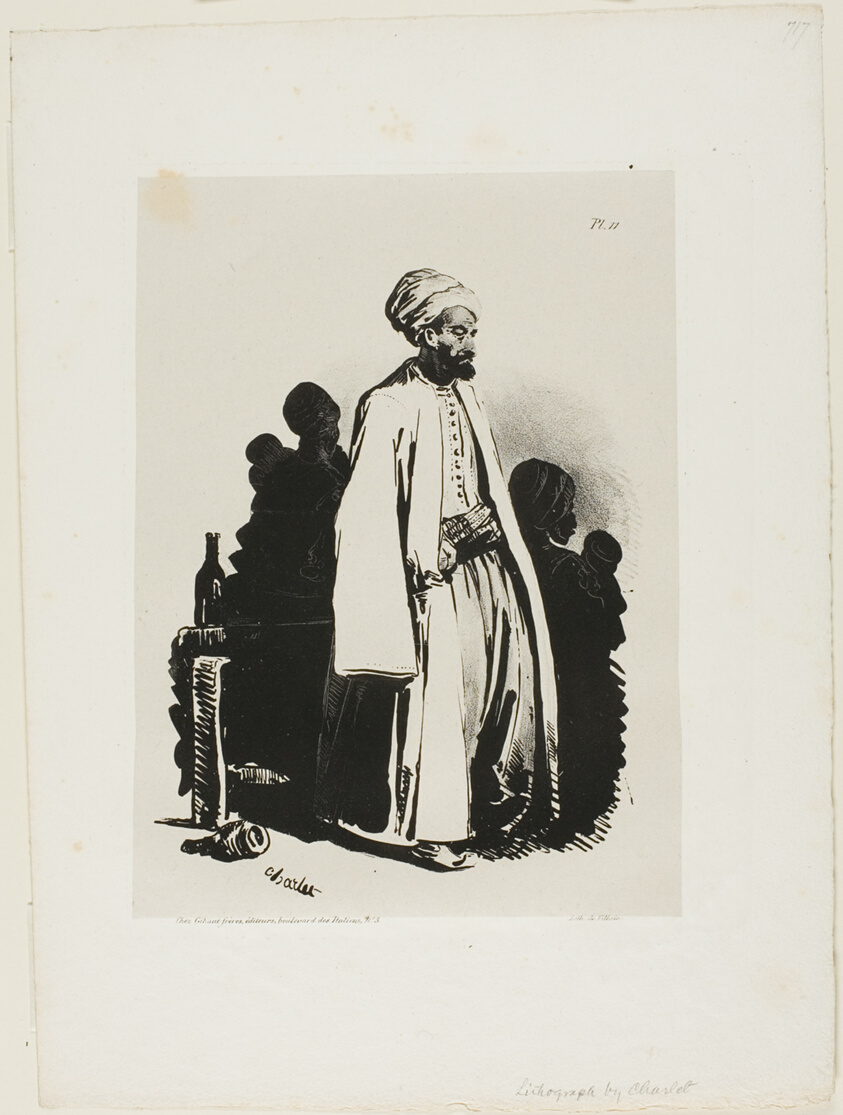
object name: Print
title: Standing Turk, plate eleven from Ink Sketches by Charlet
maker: Nicolas Toussaint Charlet (French, 1792-1845); printed by François le Villain (French, active early 19th century)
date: 1828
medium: Lithograph in black on light gray China paper, laid down on white wove paper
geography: France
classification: lithograph; print; prints and drawing